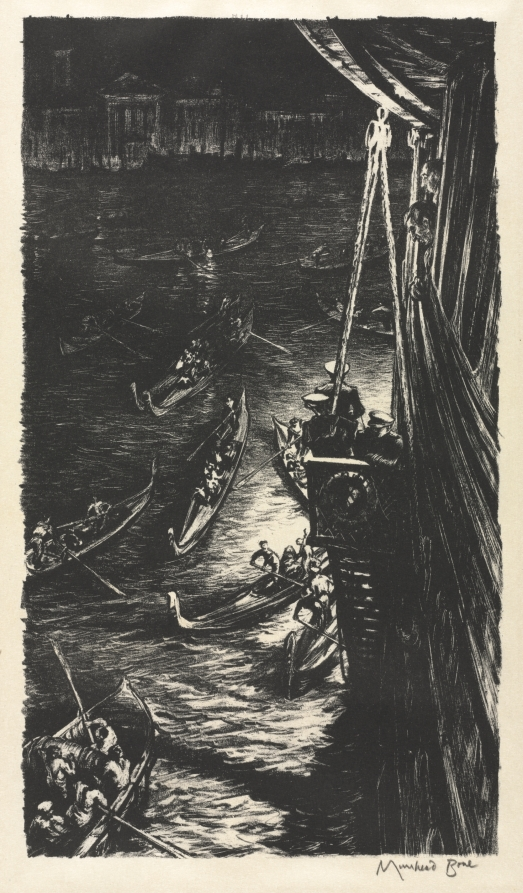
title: Midnight at Venice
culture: England, 20th century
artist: Muirhead Bone (British, 1876–1953)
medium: drypoint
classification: Print